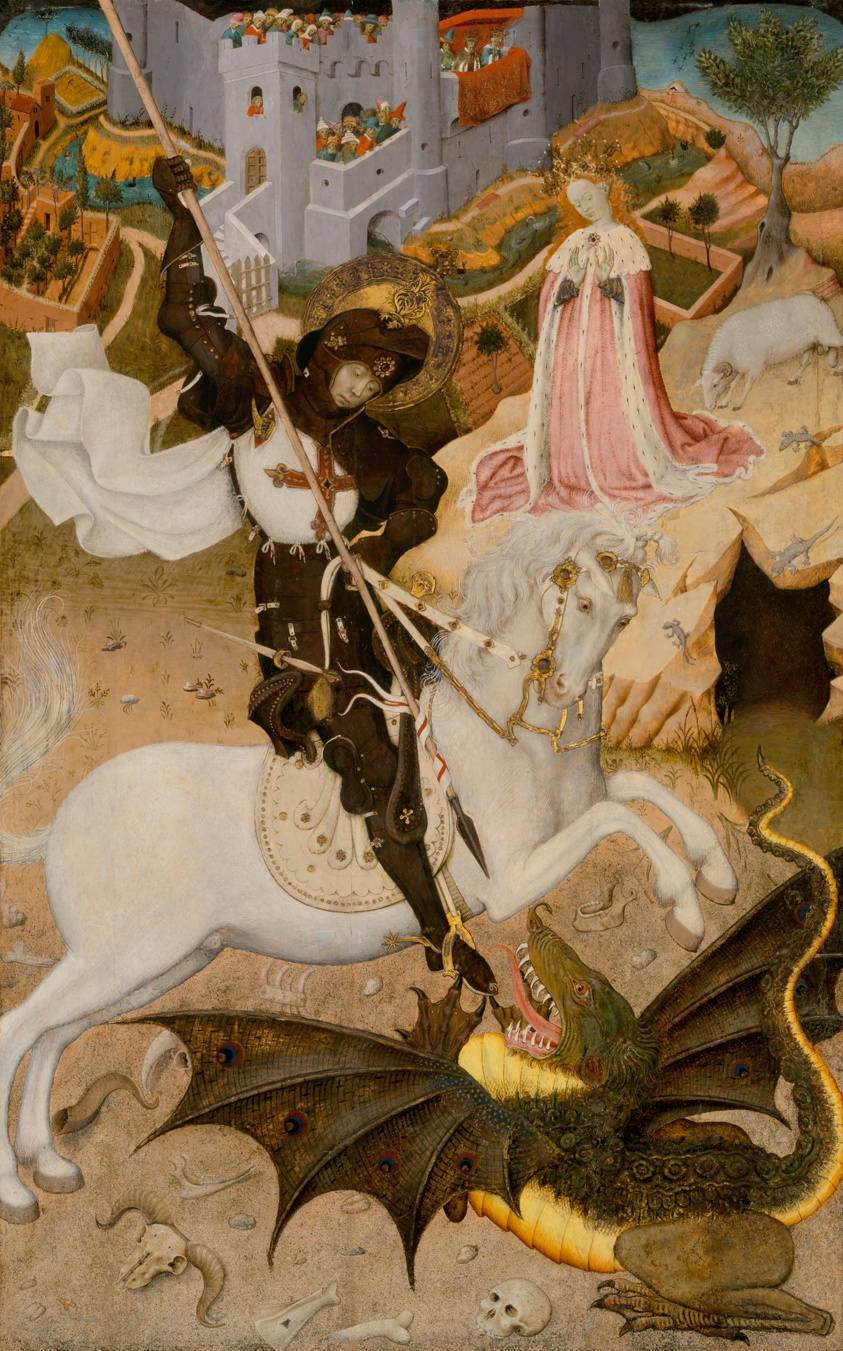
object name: Painting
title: Saint George and the Dragon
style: Renaissance, Gothic (medieval), 15th century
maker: Bernat Martorell (Spanish, active from 1427–died 1452)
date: 1434/35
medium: Tempera on panel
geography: Spain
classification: painting; tempera; spanish; paint; european painting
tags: knights, woman, weapons, trees, towns, spears, rocks, ram, queens, nobility, lizards, king, horse, figures, Christianity, Christian subjects, cave, bones, mythology, dragons, horses, royalty, castles, religion, Century of Progress, world's fairs, Chicago World's Fairs, animals